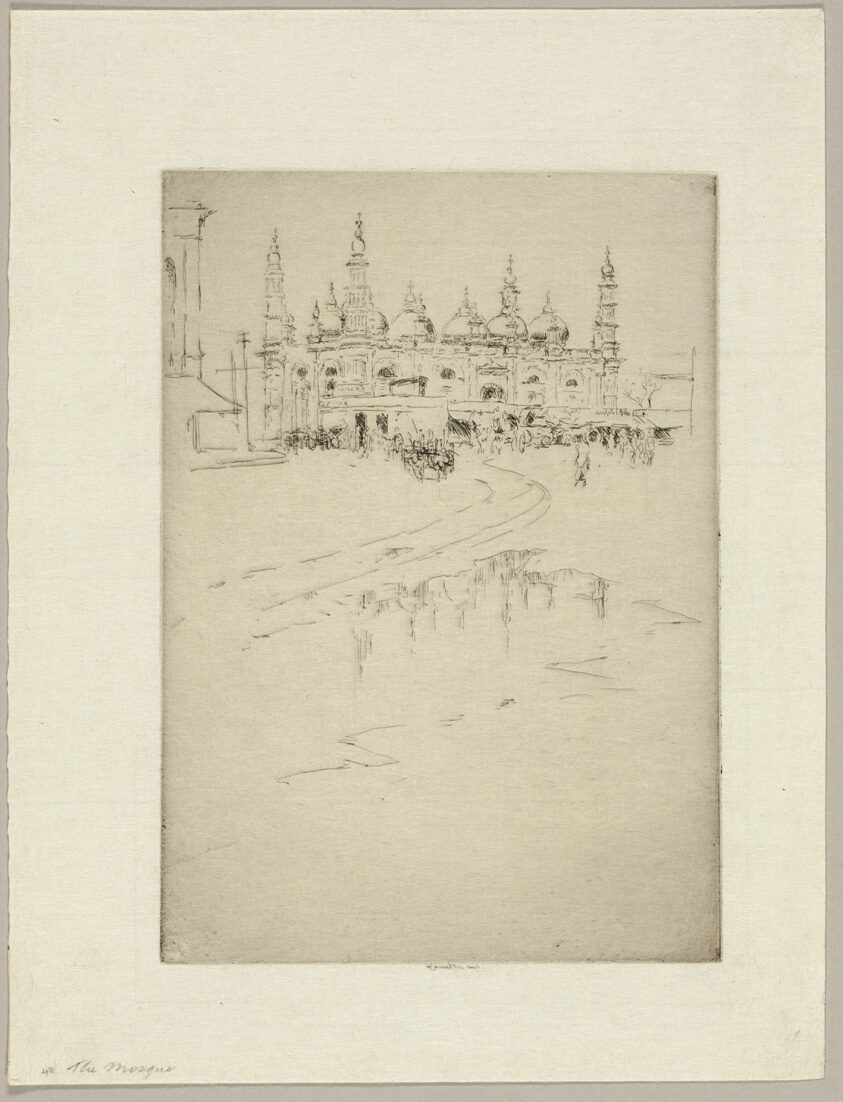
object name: Print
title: The Mosque, Delphi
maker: Ernest S. Lumsden; English, 1883-1948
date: 1912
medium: Etching in brownish black ink on cream laid paper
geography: England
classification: etching; print; prints and drawing